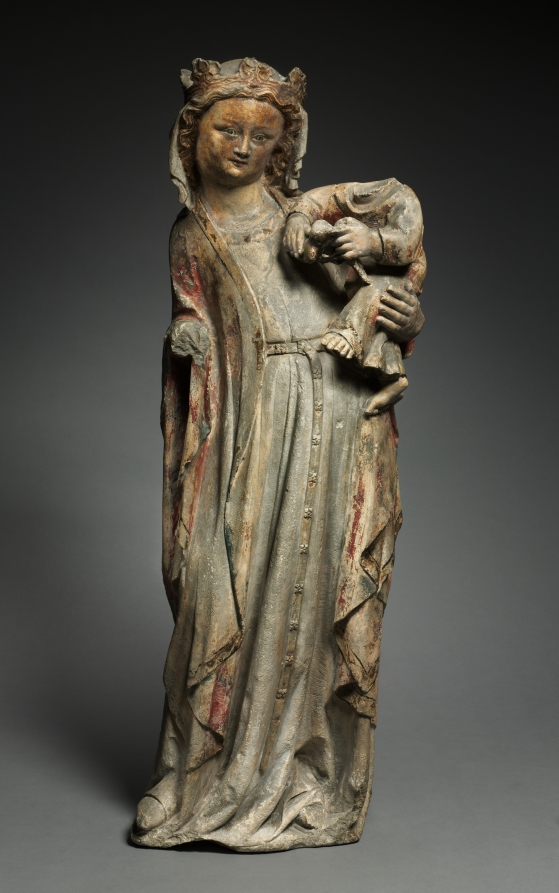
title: Virgin and Child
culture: France, Lorraine, 14th century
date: c. 1315–20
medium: limestone with traces of polychromy and gilding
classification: Sculpture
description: This graceful Virgin and child is a beautiful example from a large number of such figures produced in Lorraine, in eastern France, during the early 1300s. Lorraine at the time had a well-established artistic tradition and was under the rule of the Counts of Bar with established cultural links to both Flanders and England. Many of the surviving Lorraine Virgins share common characteristics consistent with this example--the swaying posture, with the weight of the Virgin placed on the left foot; and an open mantle with an exposed belted gown, the girdle itself trailing to the ground and ornamented with rosettes. Such standing figures were likely made for use in parish churches, cathedrals, aristocratic oratories, and monastic chapels, and attest to the intense veneration rendered to the Virgin during the period.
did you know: The CMA has a rare example of a similar woman’s belt (1930.742).